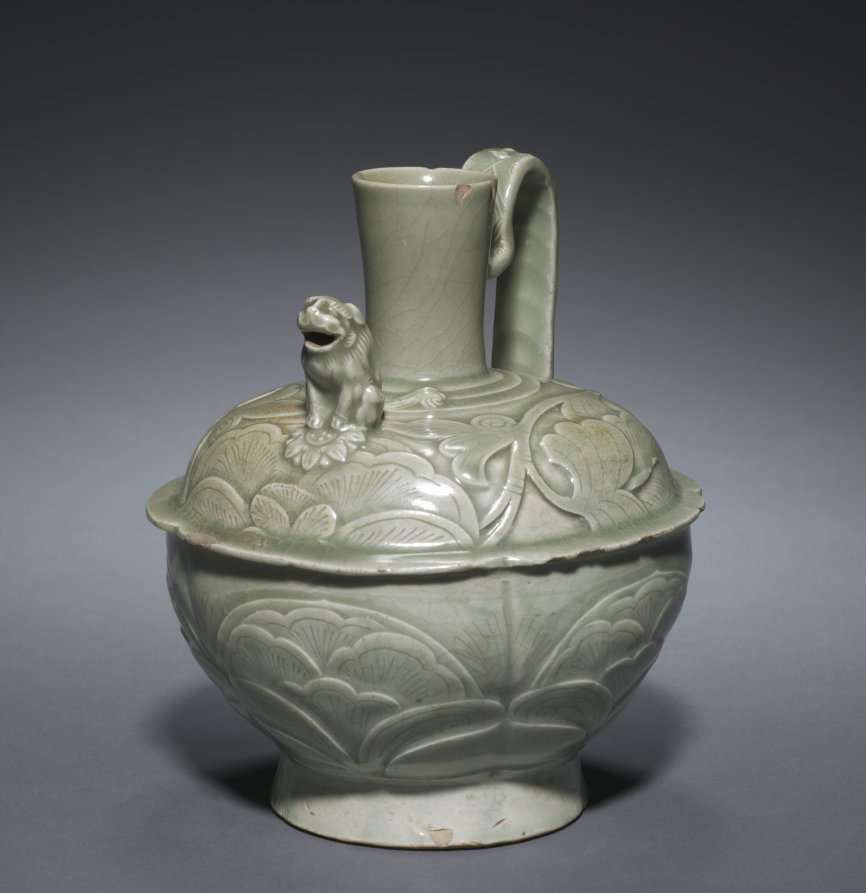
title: Ewer with a Lion-shaped Spout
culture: China, Shaanxi province, Tongchuan, Huangbaozhen, Five Dynasties period (907-960) or Northern Song dynasty (960-1126)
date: 900s–1000s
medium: green-glazed porcelaneous stoneware with modeled, carved and incised decoration, Yaozhou ware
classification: Ceramic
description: This remarkable ewer is most likely a very early and rare type of Yaozhou ware, with the shape and decoration recalling Tang metal ware. High quality pieces like this might have been sent as tribute to the Northern Song court. Yaozhou ware, or northern celadon, appeared to have been made in the north in emulation of the southern Yue ware. But its green glaze has a deep olive-green tone, and potters fully exploited the contrasting tones of the glaze over the incised and carved decoration to create rich textural effects.